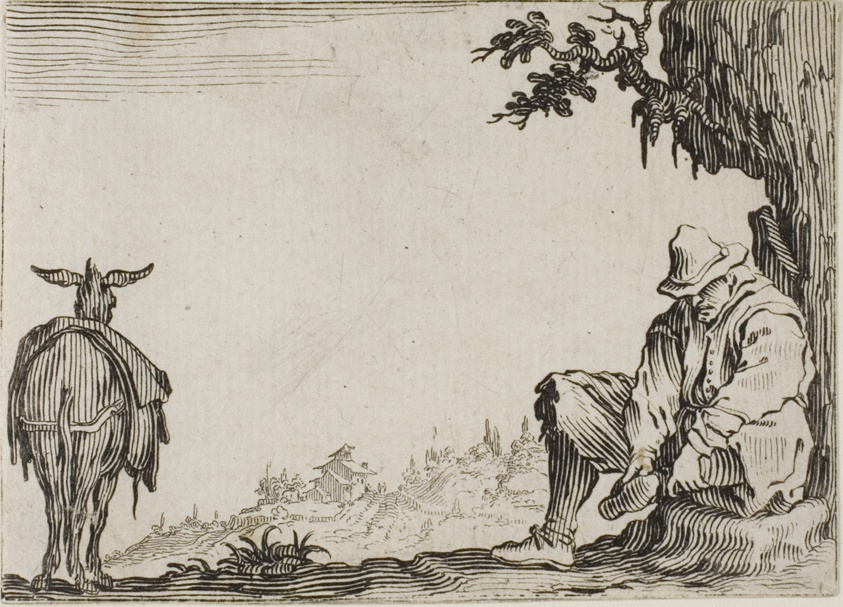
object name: Print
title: The Peasant Removing his Shoes, from The Caprices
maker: Jacques Callot (French, 1592-1635)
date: c. 1622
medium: Etching on ivory laid paper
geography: France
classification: etching; print; prints and drawing